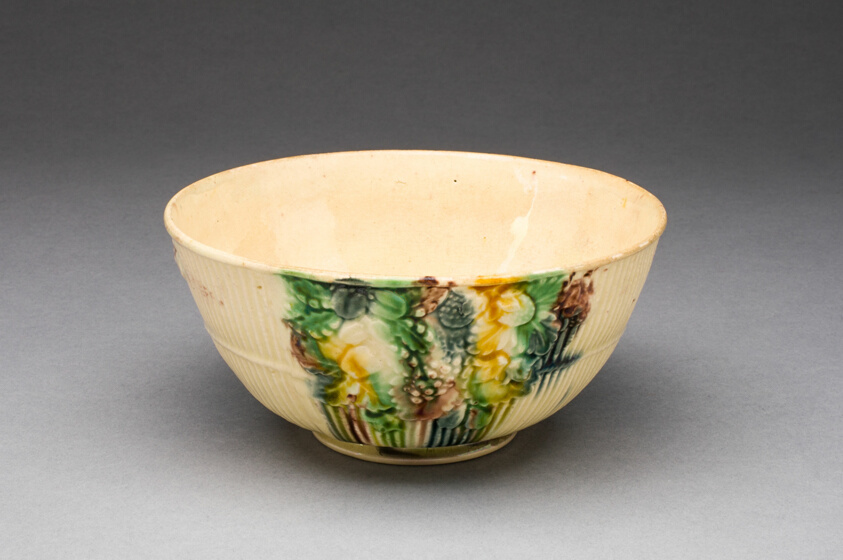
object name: Ceramics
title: Bowl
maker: England, Staffordshire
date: 1760/69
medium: Lead-glazed earthenware (creamware)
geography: Staffordshire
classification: bowl; dish (vessel); european decorative arts; creamware; ceramics; earthenware; lead-glazed earthenware